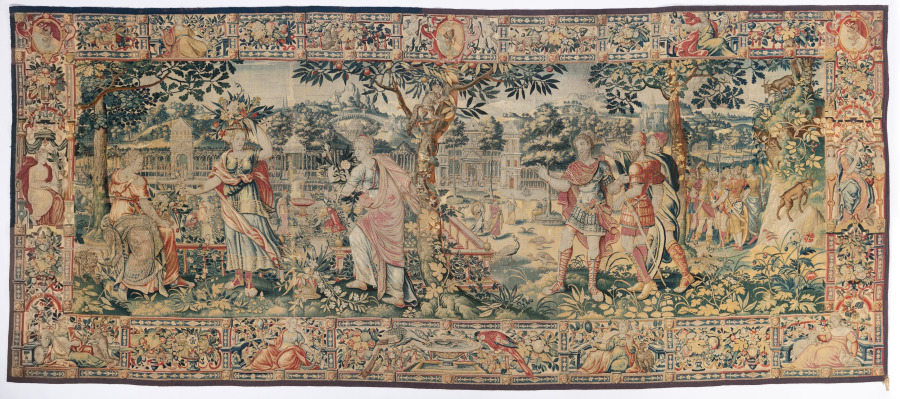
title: Romans Admiring the Sabine Women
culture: Belgium, Brussels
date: 1570–90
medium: silk and wool: tapestry weave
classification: Tapestry